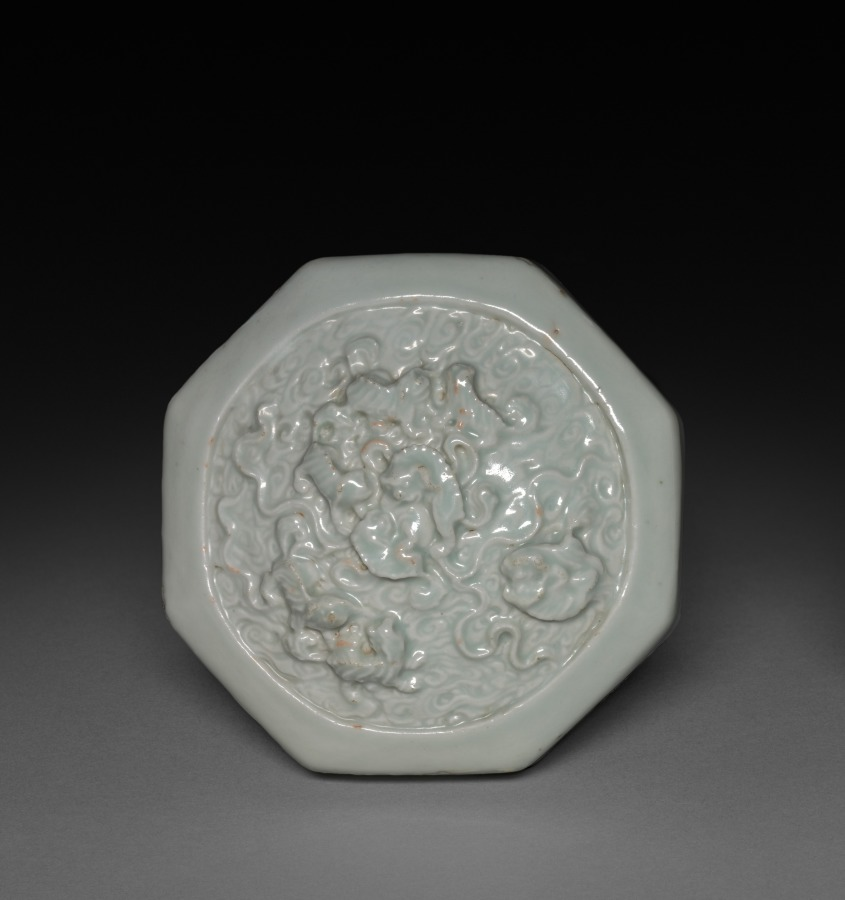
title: Hexagonal Covered Box with Lions in Relief: Qingbai Ware (lid)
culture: China, Jiangxi province, Jingdezhen kilns, Yuan dynasty (1271-1368)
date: 1300–1325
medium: glazed porcelain with molded and applied decoration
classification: Ceramic